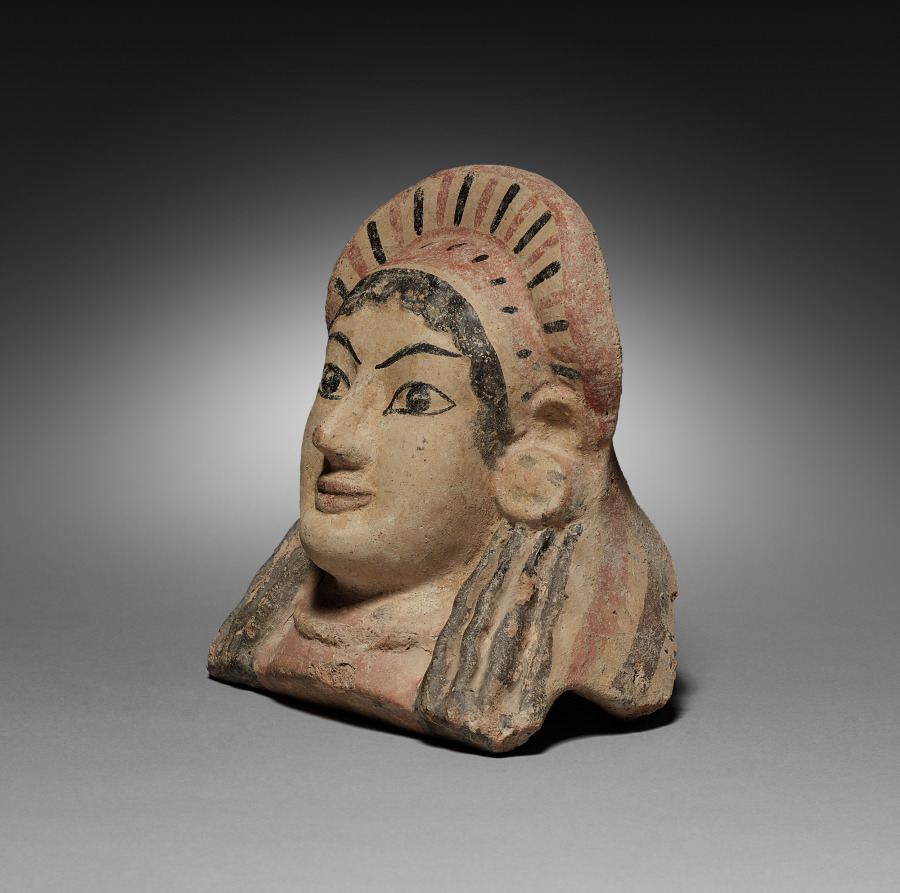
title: Antefix in the Form of a Maiden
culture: Etruscan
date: late 500s–early 400s BCE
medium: Painted terracotta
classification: Sculpture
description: Staring out with almond-shaped eyes and enigmatic smile, this brightly painted female head hides a rounded back made to serve an important function. She is a molded terracotta antefix, made to cap an open-ended roof tile along the sloping edge of a wooden building. Depending on the size of the structure it adorned, this antefix may have sat alongside dozens of others, likely all similar in form and painted decoration, and perhaps accompanied by additional polychrome architectural sculpture. Sometimes identified as maenads, the female followers of Dionysos (Etruscan Fufluns), such figures might also be nymphs or anonymous maidens.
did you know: Much Etruscan architectural sculpture was molded terracotta rather than carved stone.